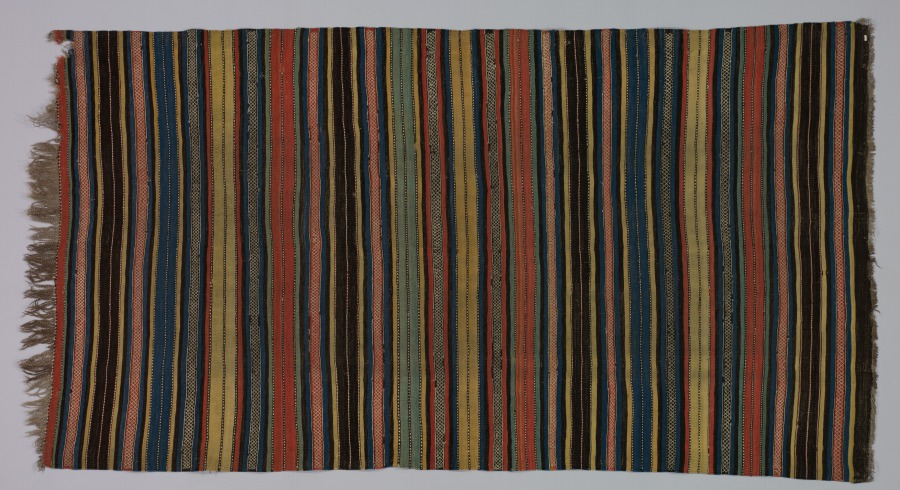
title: Blanket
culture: Tibet ?, 19th century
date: 19th century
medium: weft faced plain weave with supplementary weft: wool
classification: Textile